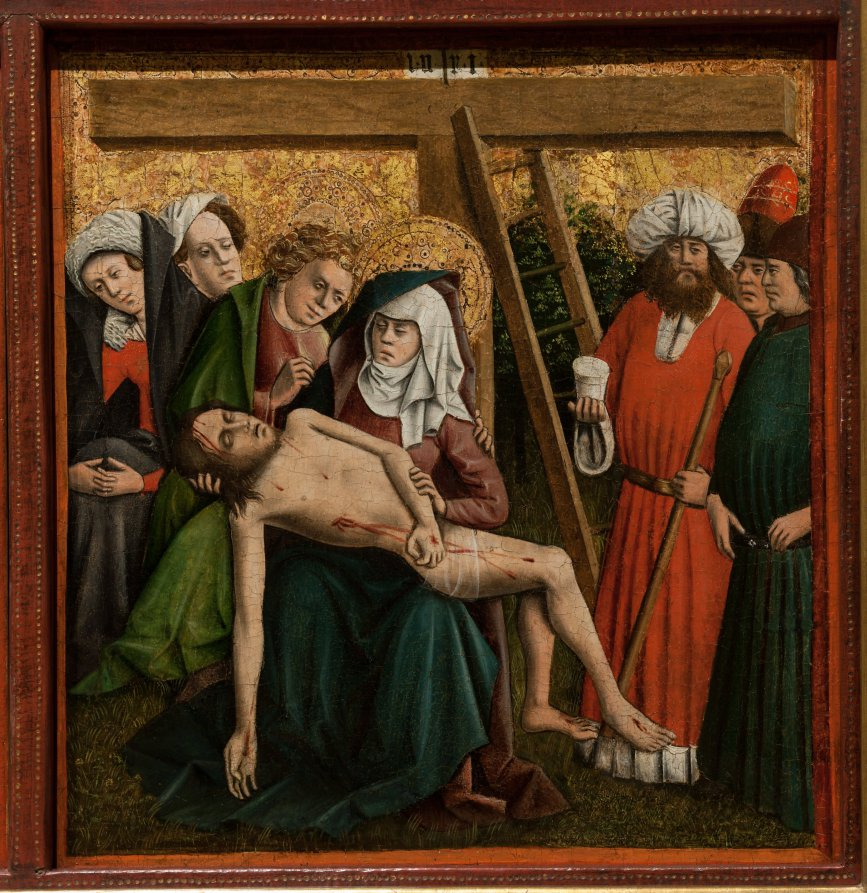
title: Altarpiece with The Passion of Christ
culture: Germany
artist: Master of the Schlägl Altarpiece (German)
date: c. 1440s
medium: oil and gold on wood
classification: Painting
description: The visual focus of this altarpiece is the suffering and death of Christ on the cross. So-called Passion cycles in art include the events leading up to and following the Crucifixion, not only as single subjects but as scenes meant to be read in sequence. Passion cycles were promoted by the two great teaching orders, the Franciscans and the Dominicans, for whom this subject represented the main religious drama of their churches, and also by the German mystics who advocated private contemplation on the humanity and suffering of Christ. The original context for this altarpiece remains unknown, but it was probably made for a religious institution in Westphalia in the Rhine Valley. During the 1870s it was given to the Abbey of Schlägl, near Linz in Upper Austria, from which both altarpiece and artist take their names. The altarpiece is not preserved today in its original format, and some of the individual scenes are missing. Scholars continue to debate the original number of scenes and their sequencing; nine of the original panels have survived, four are shown here.